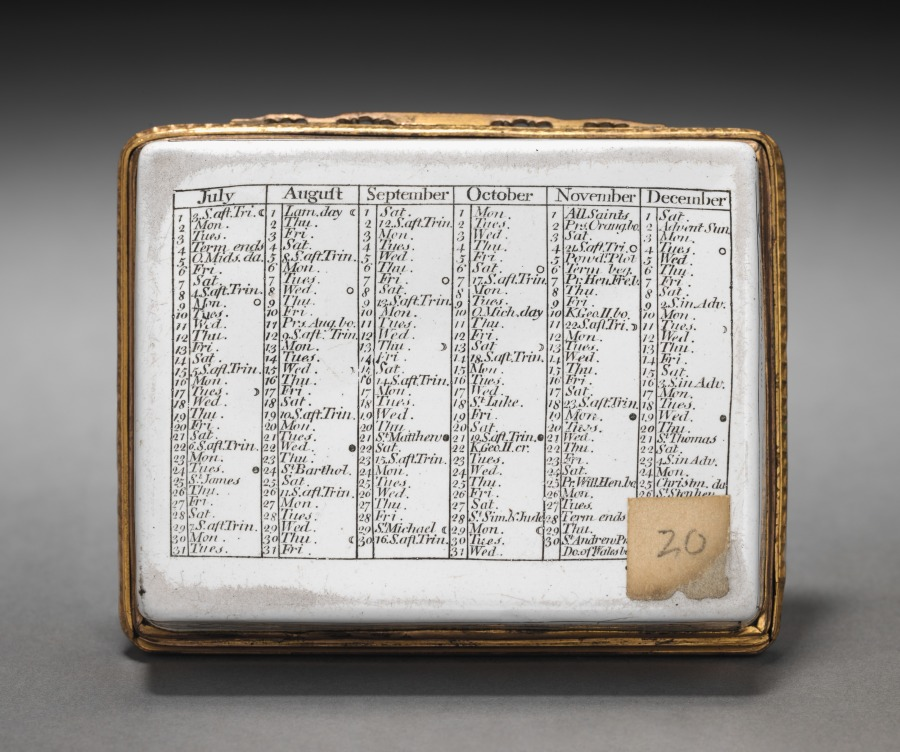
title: Snuff Box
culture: England, Birmingham, mid-18th Century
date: 1759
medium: enamel on copper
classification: Enamel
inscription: Dated: "1759"